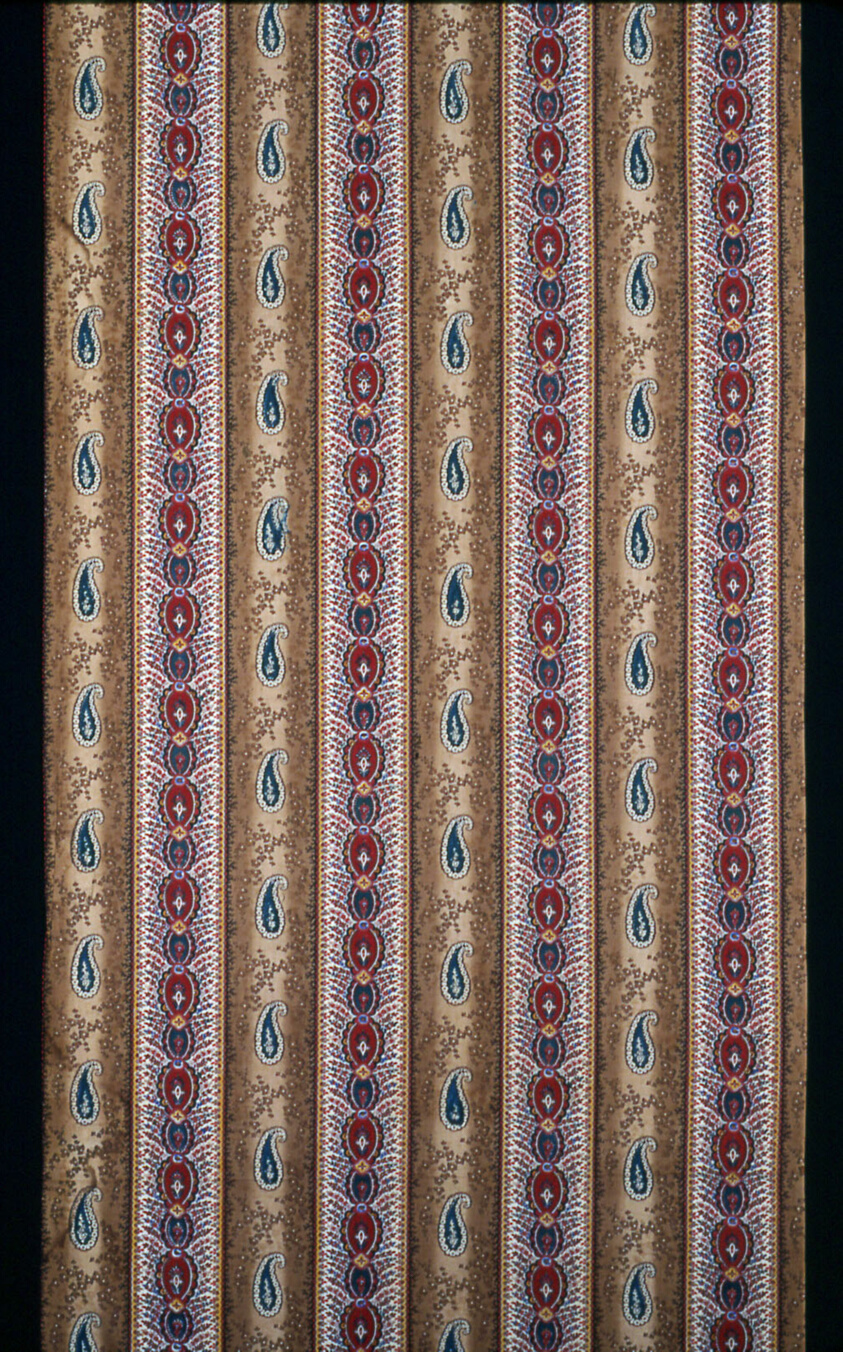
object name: Textile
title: Two Panels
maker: United States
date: c. 1870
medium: Cotton, printed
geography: United States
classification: textile; weaving - printed